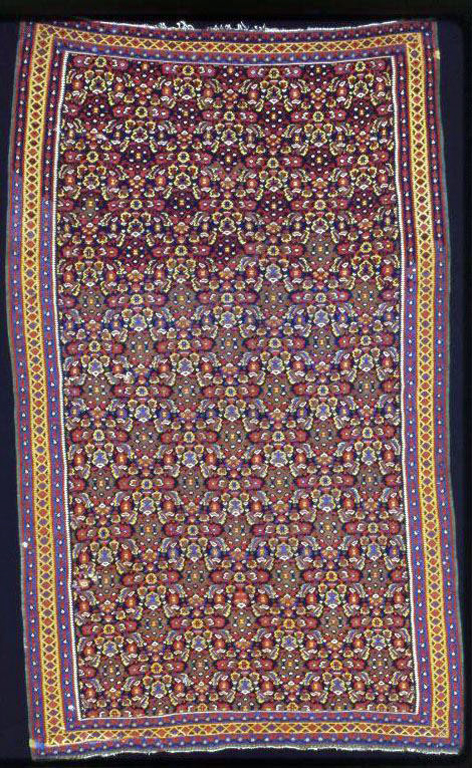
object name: Textile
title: Carpet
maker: Iran (Persia)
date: 1875/1900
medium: Cotton and wool, slit tapestry weave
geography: Iran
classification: textile; weaving - carpet; weaving